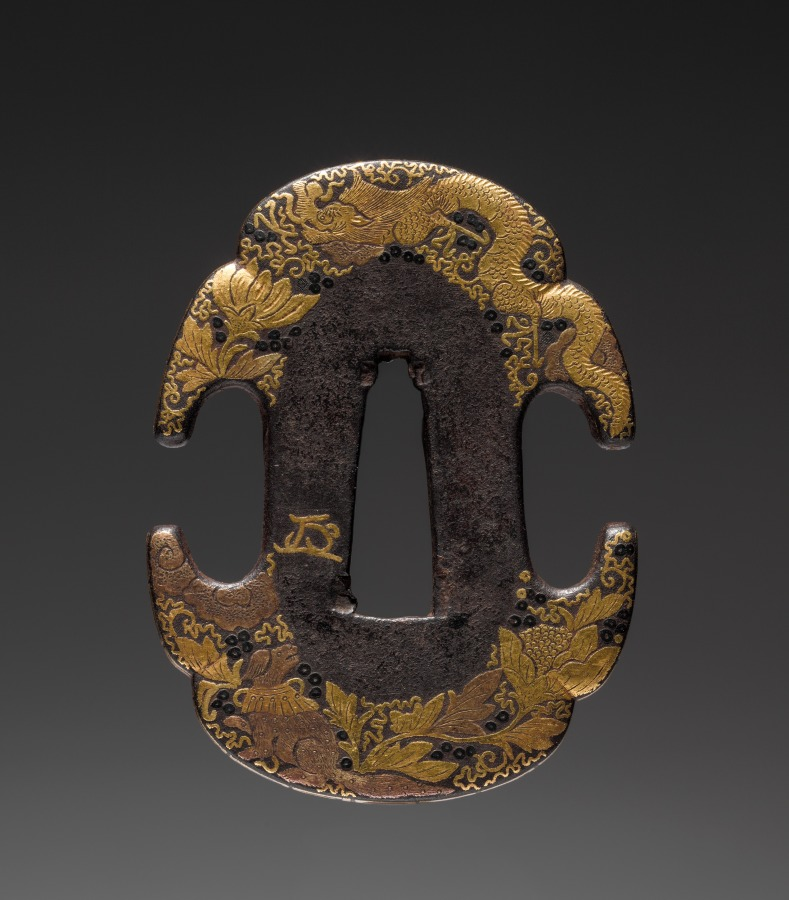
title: Sword Guard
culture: Japan, Edo period (1615–1868)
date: early 1800s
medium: iron with gold inlay (Kyoto type)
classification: Arms and Armor